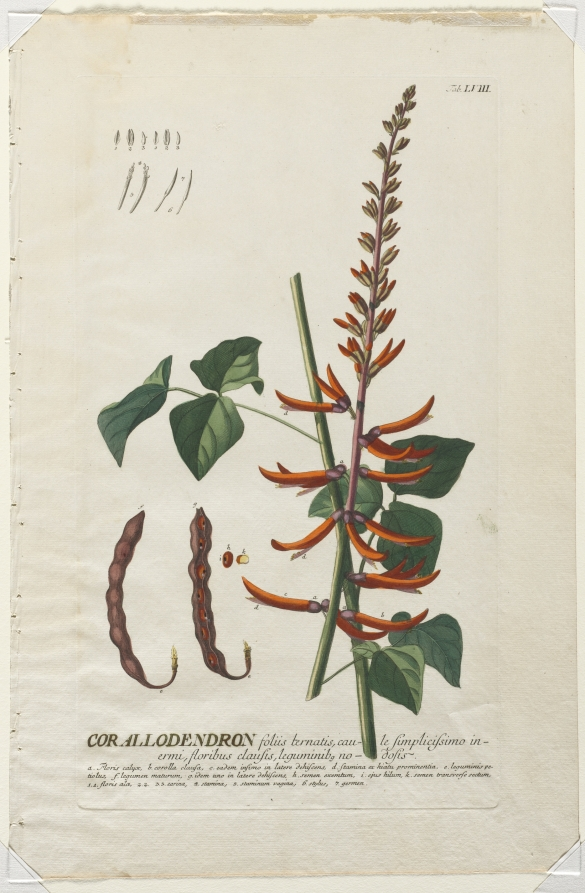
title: Plantae Selectae: No. 58 - Corallodendron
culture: Germany, 18th century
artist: Georg Dionysius Ehret (German, 1708–1770)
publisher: Christopher Jacob Trew (German, 1695–1769)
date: published 1750–73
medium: engraving, hand-colored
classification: Print